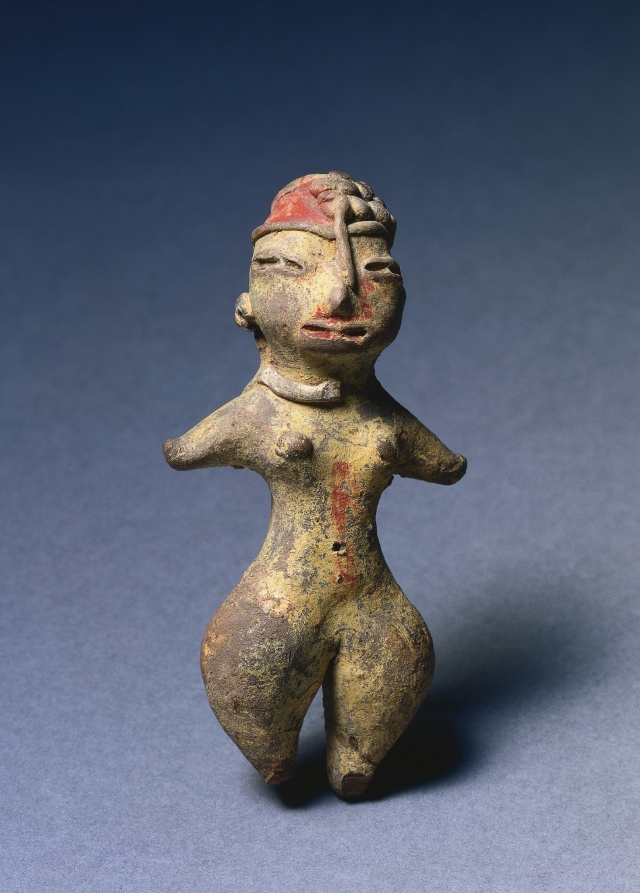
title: Standing Female Figurine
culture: Mesoamerica, Central Mexico, Tlatilco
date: 1200–400 BCE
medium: ceramic with pigment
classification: Ceramic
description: This figurine represents the best-known type found in graves at Tlatilco, an early farming village on the outskirts of Mexico City. The type is known as the “pretty lady” after its representatives’ sweet faces, fancy hairstyles, pinched waists, and flaring hips and thighs.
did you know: This figurine represents the best-known type found in graves at Tlatilco, an early farming village.